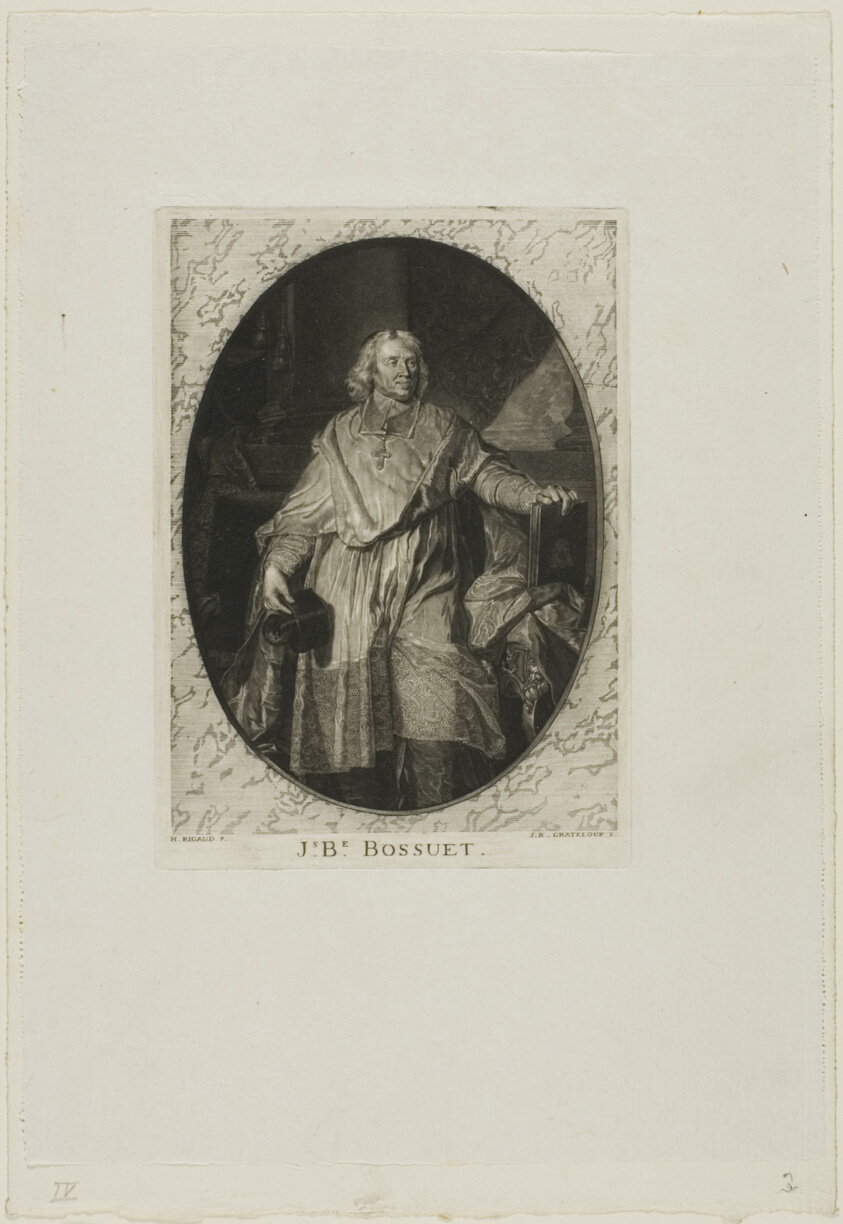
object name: Print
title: J-B. Bosseut: Standing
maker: Jean-Baptiste de Grateloup (French, 1735-1817)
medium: Aquatint on paper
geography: France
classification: aquatint; print; prints and drawing